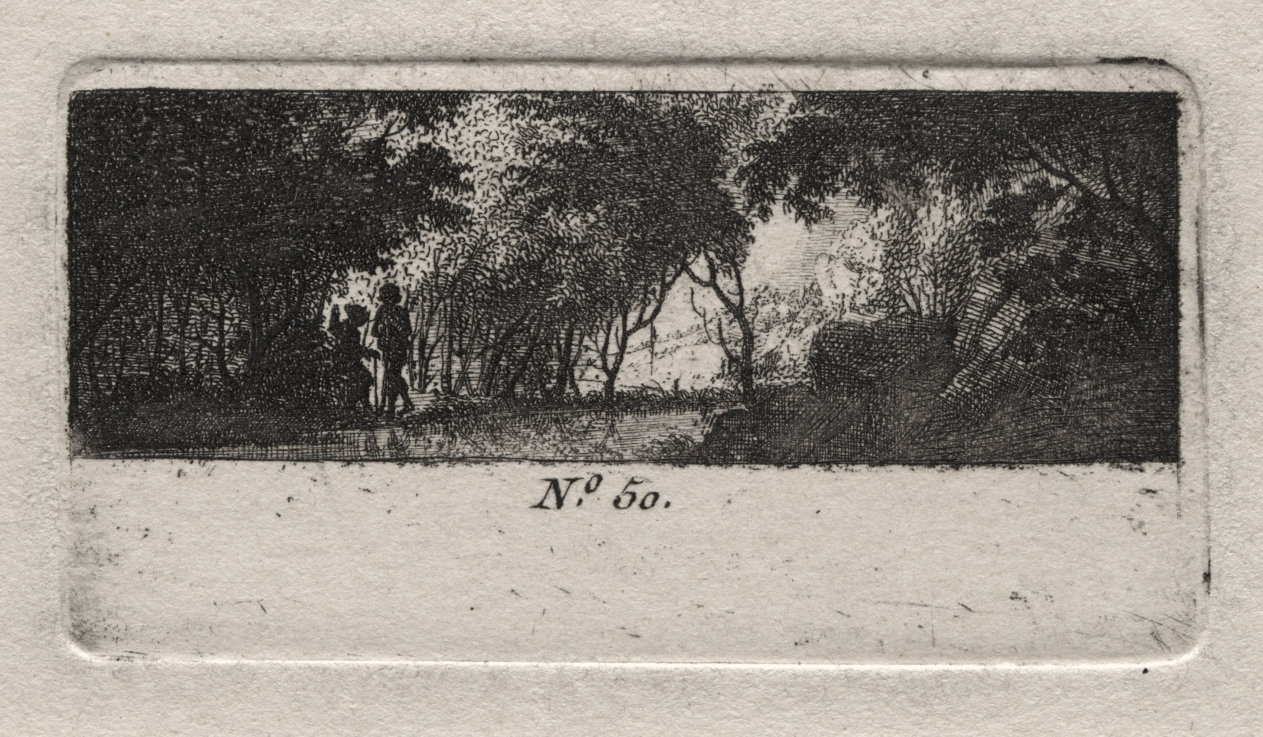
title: View of a Woods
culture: France, 18th century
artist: Antoine de Marcenay de Ghuy (French, 1724–1811)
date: c. 1778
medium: etching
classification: Print